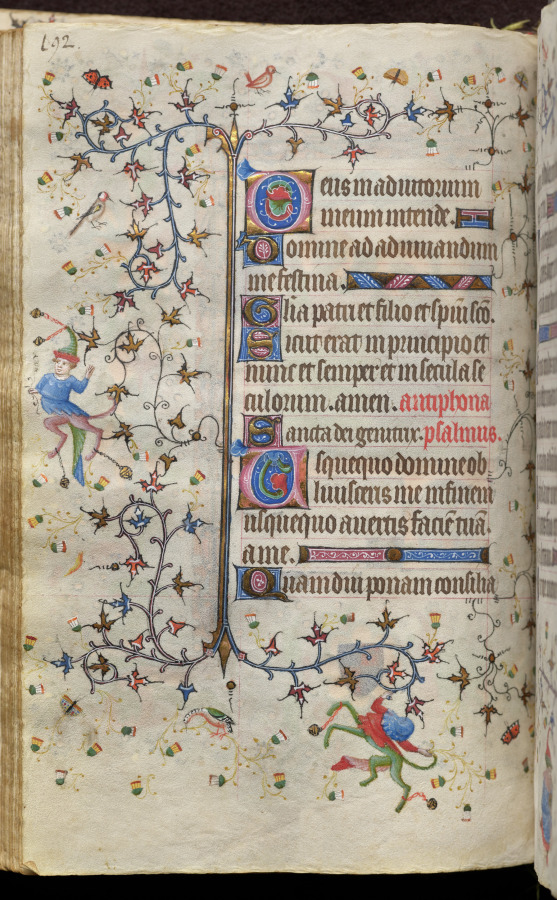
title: Hours of Charles the Noble, King of Navarre (1361-1425): fol. 96v, Text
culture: France, Paris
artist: Master of the Brussels Initials and Associates (French)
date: c. 1405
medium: ink, tempera, and gold on vellum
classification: Bound Volume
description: This precious volume was obviously highly prized by its owner, the French-born King of Navarre, who had his coat of arms painted on no less than twenty folios. Rather than directly commissioning this manuscript from a specific workshop, it seems that Charles the Noble acquired his book of hours -- perhaps ready-made for the luxury market -- while on a trip to Paris in 1404-05. A collaborative effort, six painting styles are evidenced within the pages of this codex, those of two Italians, two Frenchmen, and two Netherlanders. The painter who was responsible for the planning and decoration of the book, and who produced seventeen of the large miniatures, was a Bolognese artist known as the Master of the Brussels Initials. His principal assistant, responsible for most of the borders, was a Florentine who signed his name "Zecho" da Firenze on folio 208 verso.